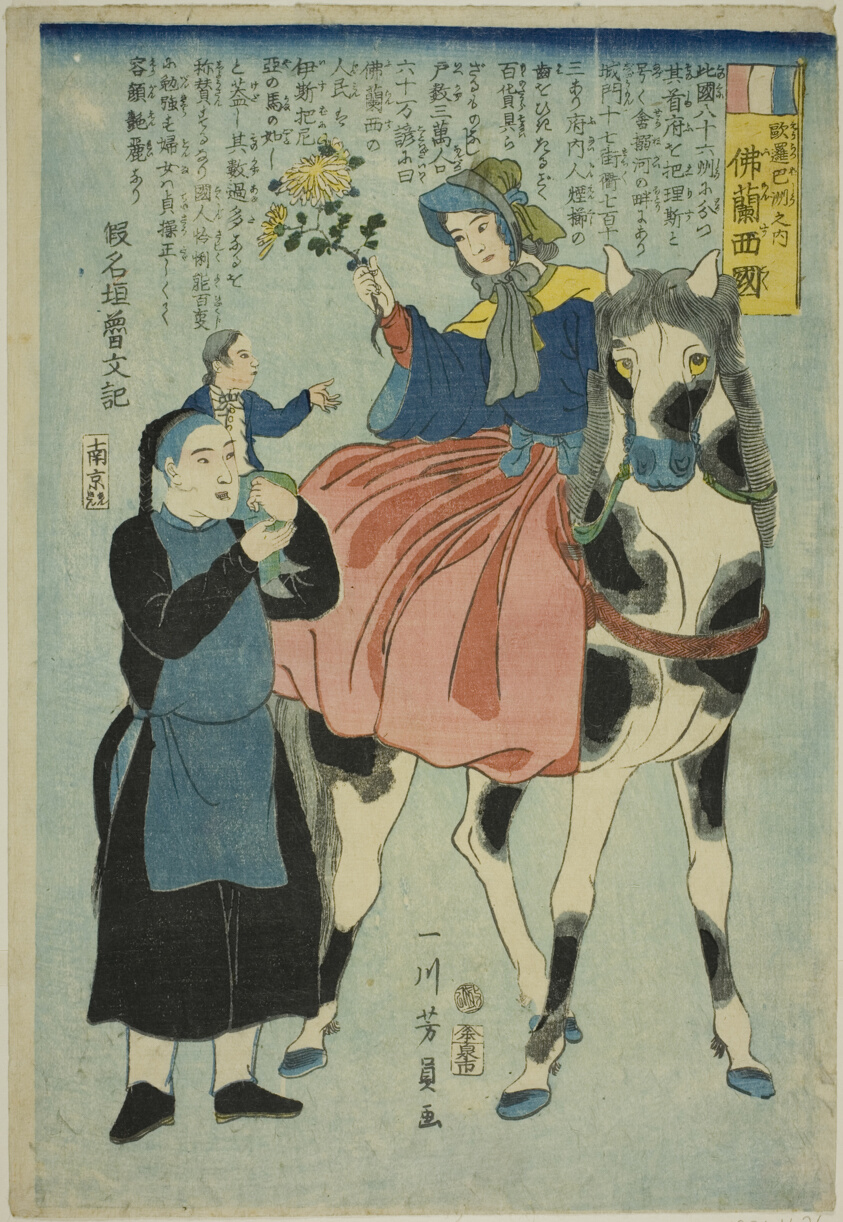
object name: Print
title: France (Furansukoku), from the Countries of Europe (Yoroppa-shu no uchi)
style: Japanese (culture or style)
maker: Utagawa Yoshikazu (Japanese, active c. 1850–70)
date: 1862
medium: Color woodblock print; oban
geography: Japan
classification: woodblock print; print; asian art